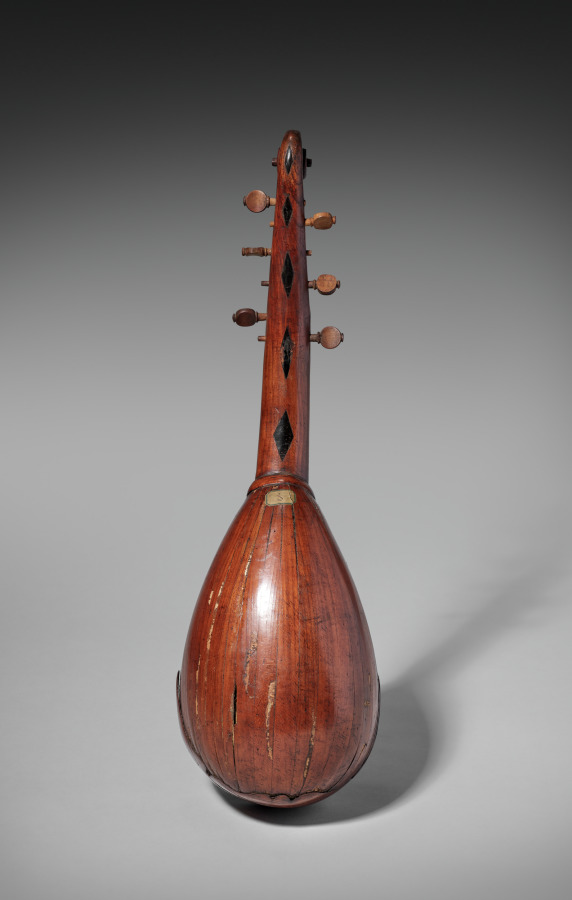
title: Pandurina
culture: Italy, 15th century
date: 1400s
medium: varnished wood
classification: Musical Instrument